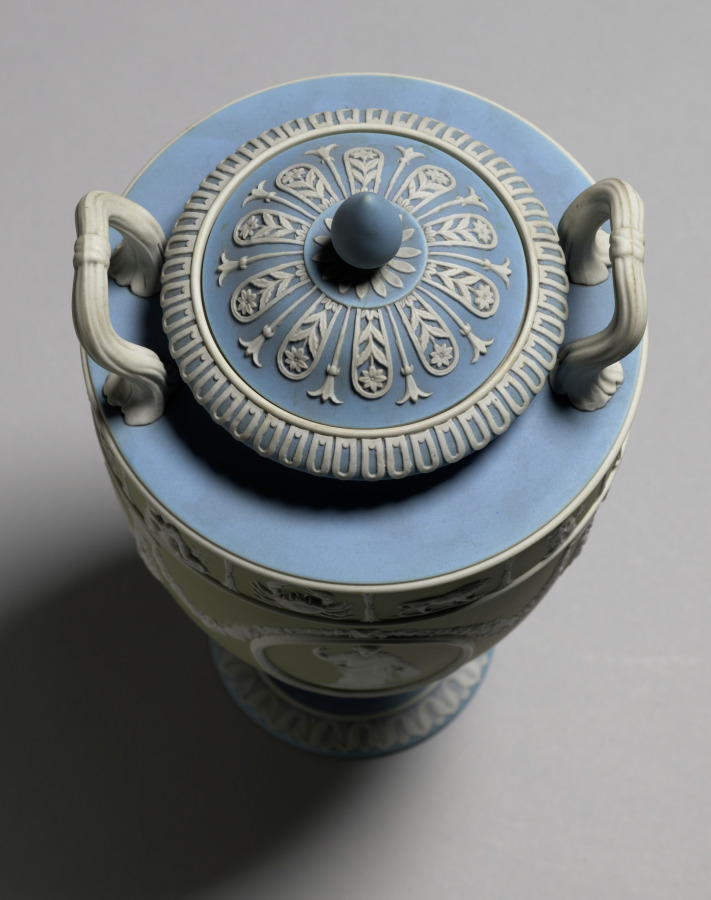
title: Covered Vase (one of a pair)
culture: England, Staffordshire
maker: Josiah Wedgwood and Sons (British, Staffordshire, est. 1759)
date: c. 1850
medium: jasper ware with relief decoration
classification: Ceramic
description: Wedgwood's tricolor jasperware first became popular in the 1770s during a period of fascination with neoclassical decoration. This vase was probably made around 1850 during the period when this type of decoration was revived. The relief medallions depict two versions of the Greek god Apollo, the god of music, next to his harp or lyre.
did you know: Signs of the zodiac form a decorative border around the upper portion of this vase.